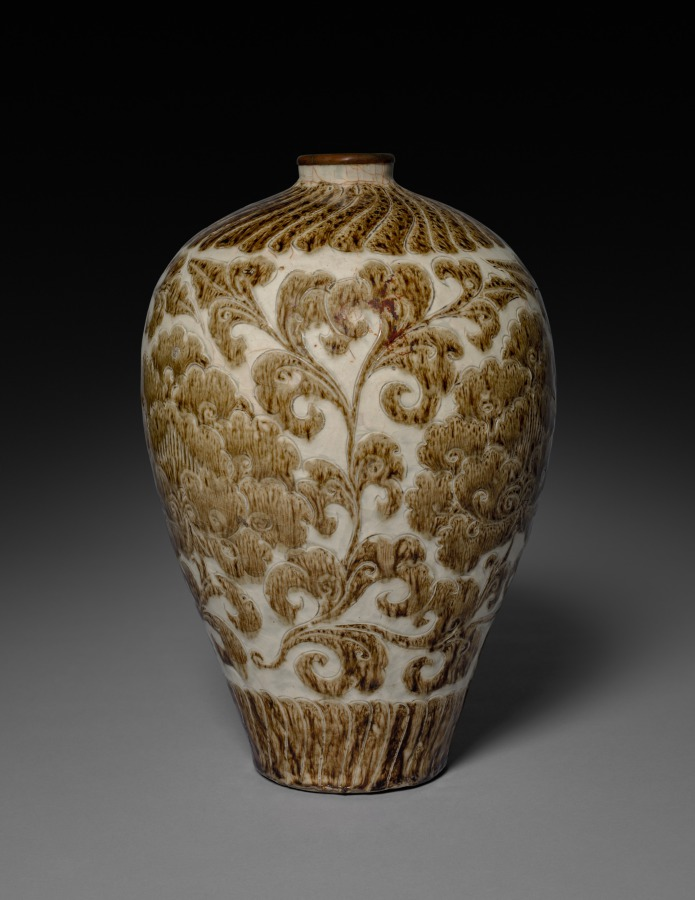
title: Meiping Vase: Cizhou Ware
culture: China, Northern Song dynasty (960-1127)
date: 1100s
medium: Buff stoneware with carved underglaze slip decoration, Cizhou ware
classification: Ceramic